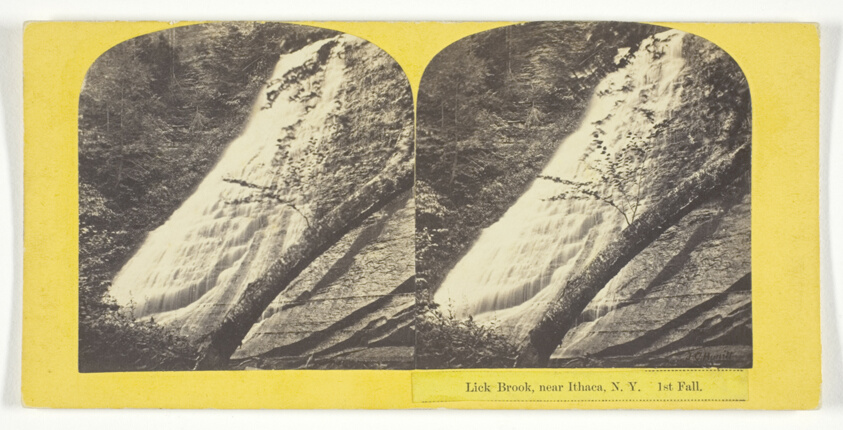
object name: Photograph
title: Lick Brook, near Ithaca, N.Y. 1st Fall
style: 19th century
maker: J. C. Burritt; American, active 1860s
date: 1860/65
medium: Albumen print, stereo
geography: Ithaca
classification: photography; photograph; albumen silver print; stereograph (albumen)